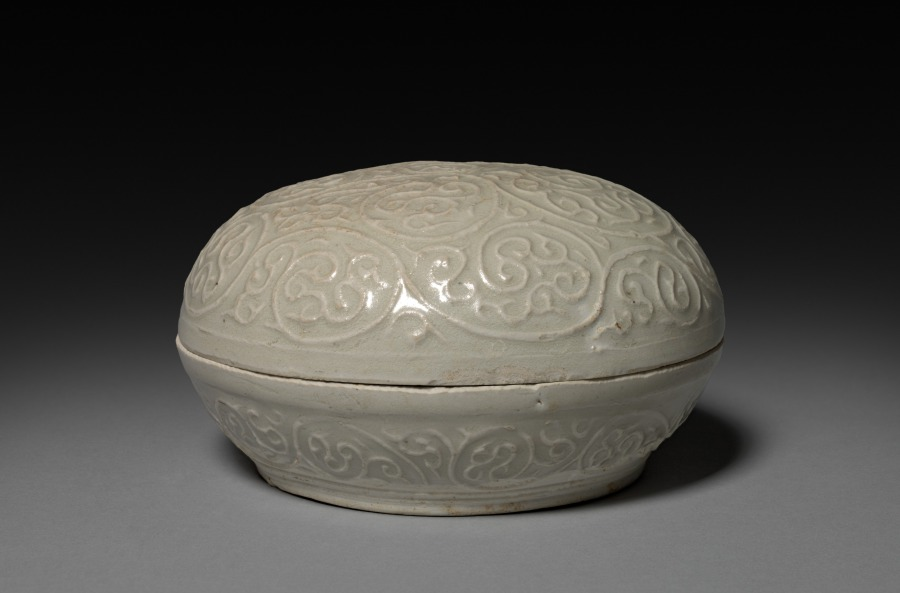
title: Round Covered Box with Floral Scrolls in Relief: Qingbai type Ware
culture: China, Fujian province, Anxi xian, Yuan dynasty (1271-1368)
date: 1300s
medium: glazed porcelain with slip decoration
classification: Ceramic